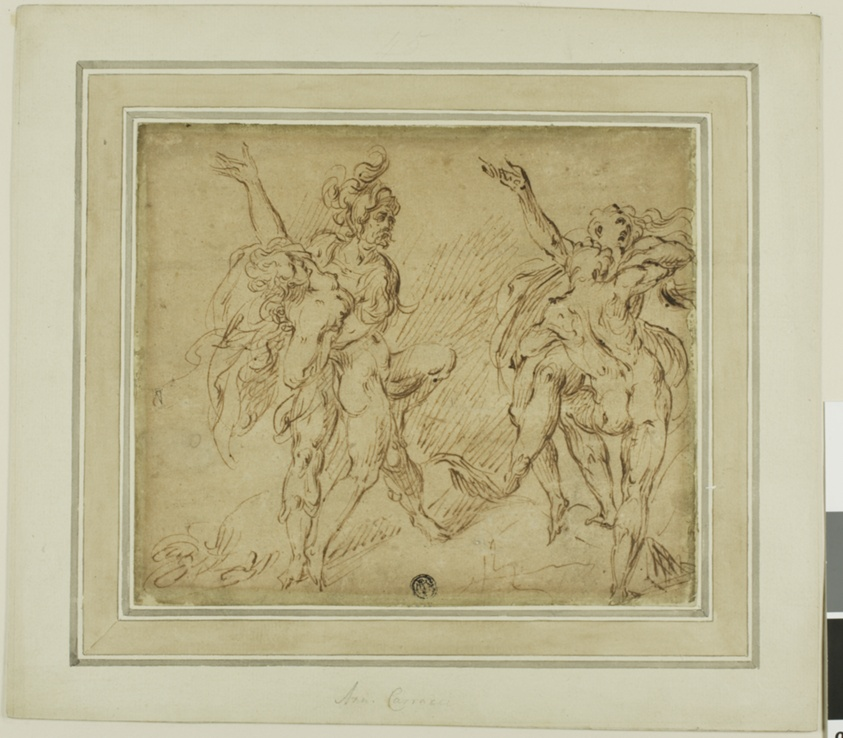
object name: Drawing and Watercolor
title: Rape of the Sabines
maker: Michel Joseph Speeckaert (Flemish, 1748-1838); or Annibale Carracci (Italian, 1560-1609)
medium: Pen and brown ink on tan laid paper, laid down on card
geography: Italy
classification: pen and ink drawings; paper; drawings (visual works); prints and drawing